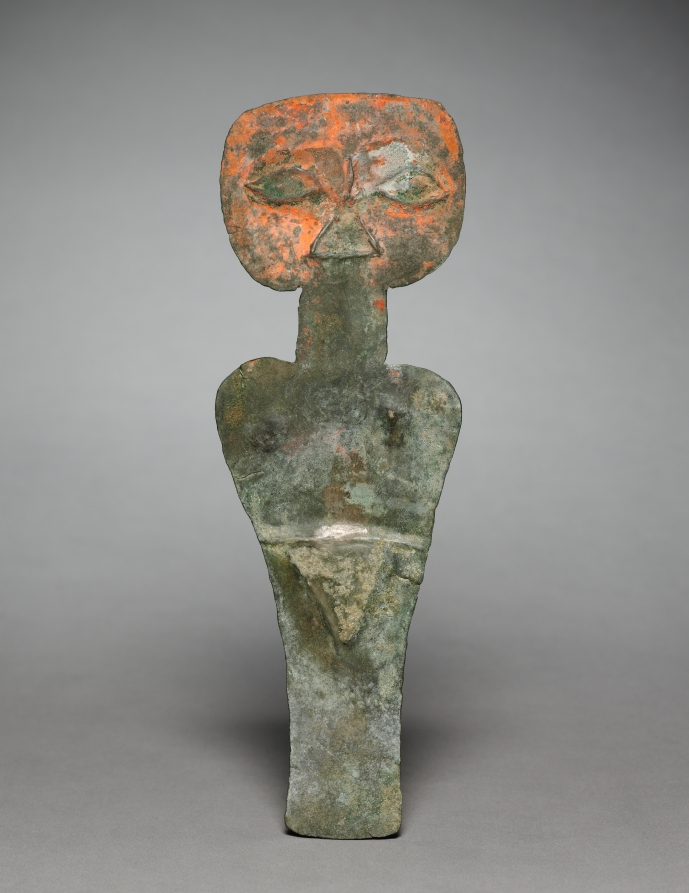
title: Funerary Female Figure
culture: Peru, South Coast, Chincha-Ica Valley area, 15th-16th century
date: 1200–1500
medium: hammered silvered copper, cinnabar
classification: Jewelry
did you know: The red pigment on the face is cinnabar, a mineral consisting of mercury sulfide.